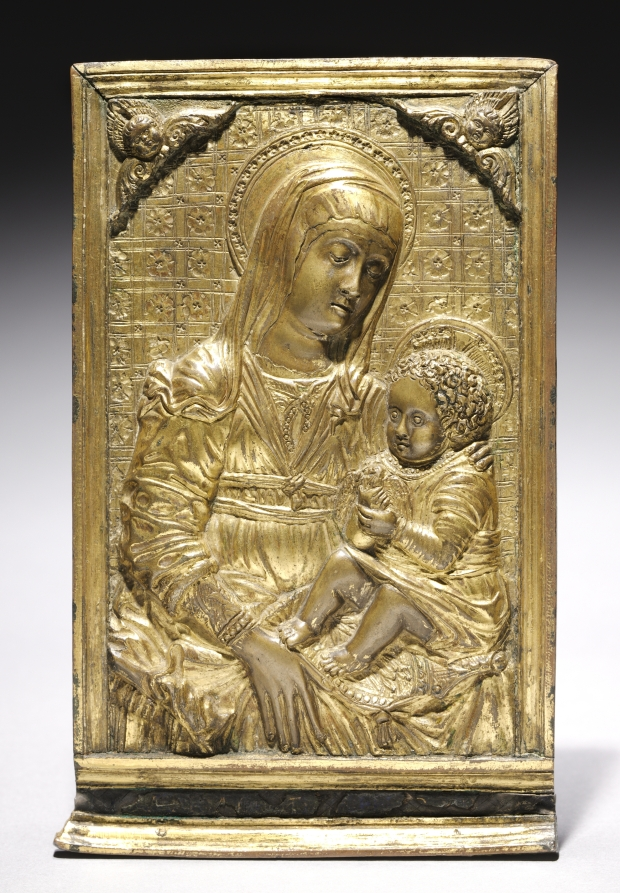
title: Pax with the Madonna and Child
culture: Italy, Florence, 15th century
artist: follower of Antonio Rossellino (Italian, 1427–1479 )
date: 1400s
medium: gilt bronze, silver, and blue enamel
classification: Sculpture